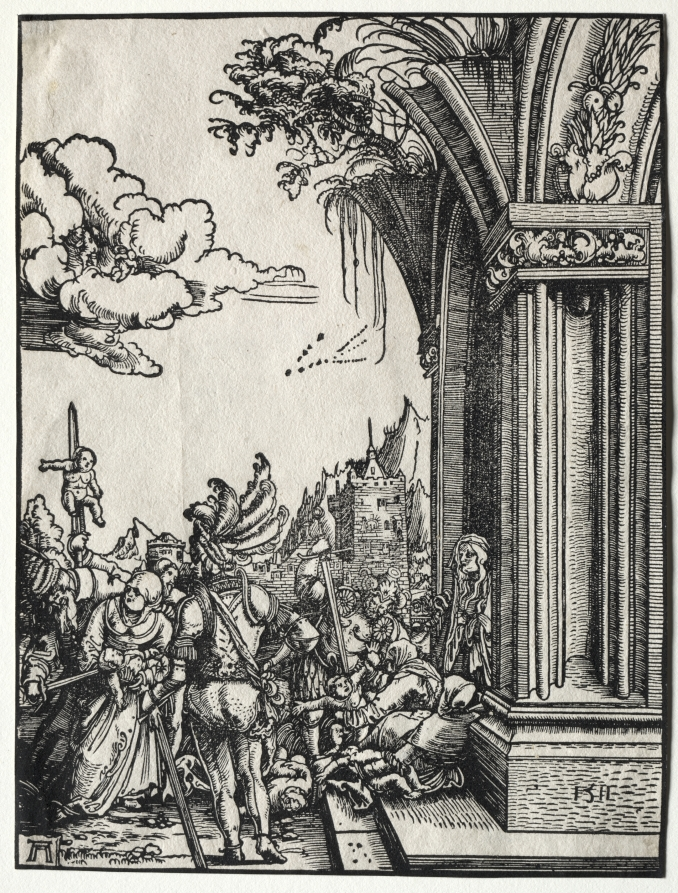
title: The Massacre of the Innocents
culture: Germany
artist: Albrecht Altdorfer (German, c. 1480–1538)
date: 1511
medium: woodcut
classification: Print